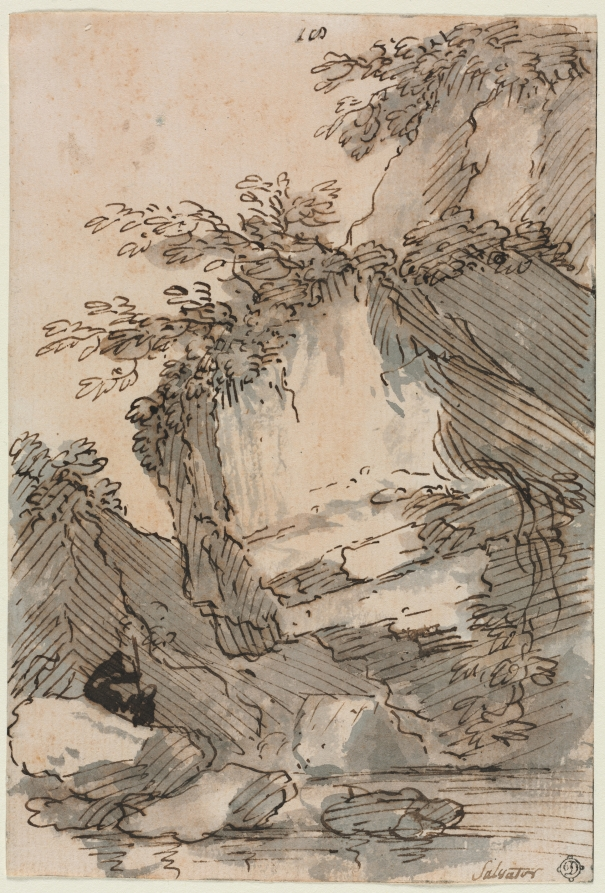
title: Figures by a Rocky Pool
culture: Italy, 17th century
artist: Salvator Rosa (Italian, 1615–1673)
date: 1660/1673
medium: pen and brown ink and brush and gray and brown wash; traces of framing lines in brown ink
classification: Drawing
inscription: [by artist?], lower right, in brown ink: Salvator ; upper center, in brown ink (over gray ink): 18 ; VERSO OF SECONDARY SUPPORT (now removed), lower left and lower center, in graphite: from the Collection of E. Desperet (1804-1865) of Paris ; lower center, in graphite: Rosa ; lower center, in graphite: Salvator Rosa / 1614-1673